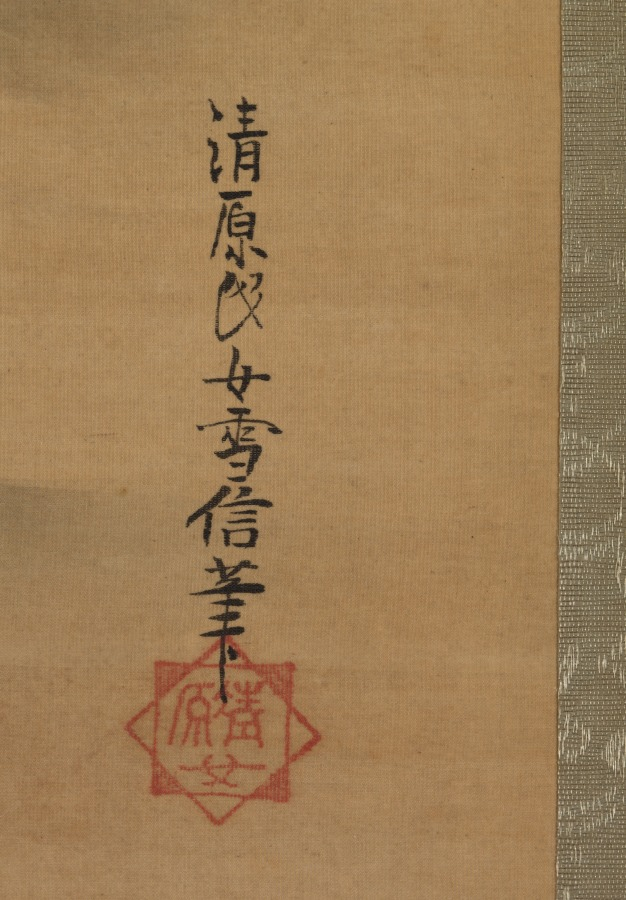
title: Minamoto no Nakakuni Visits Lady Kogō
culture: Japan, Edo period (1615–1868)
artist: Kiyohara Yukinobu (Japanese, 1643–1682)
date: late 1600s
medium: One of a triptych of hanging scrolls; ink and color on silk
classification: Painting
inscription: 款記「清原氏女雪信筆」/「清原女」朱文八角印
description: Kiyohara Yukinobu was one of Japan's earliest and most talented female painters. Kiyohara preferred Japanese style painting techniques and subjects. Her work depicts the scenery and history of her native land. In addition to the tonalities of ink, she applied a delicate range of colors. These help identify the seasons, an important theme in Japanese life and culture.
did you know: This central painting from a triptych presents an episode from The Tale of the Heike in which Minamoto no Nakakuni is sent by the emperor to look for Lady Kogō.